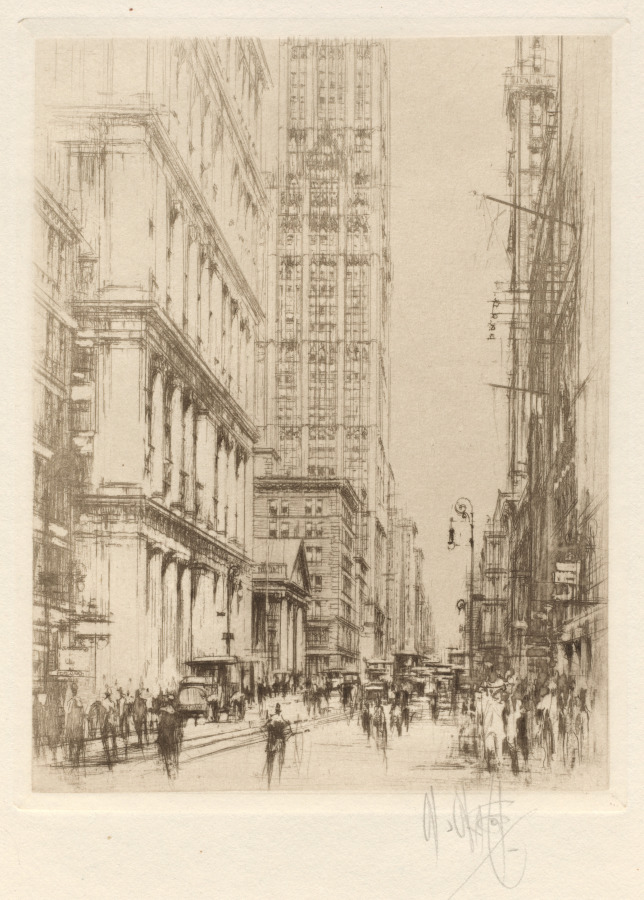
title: Lower Broadway, Down-Town New York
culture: England, 20th century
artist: William Walcot (British, 1874–1943)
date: 1924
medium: etching in brown, plate tone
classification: Print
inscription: signed lower right in pencil: W. Walcot